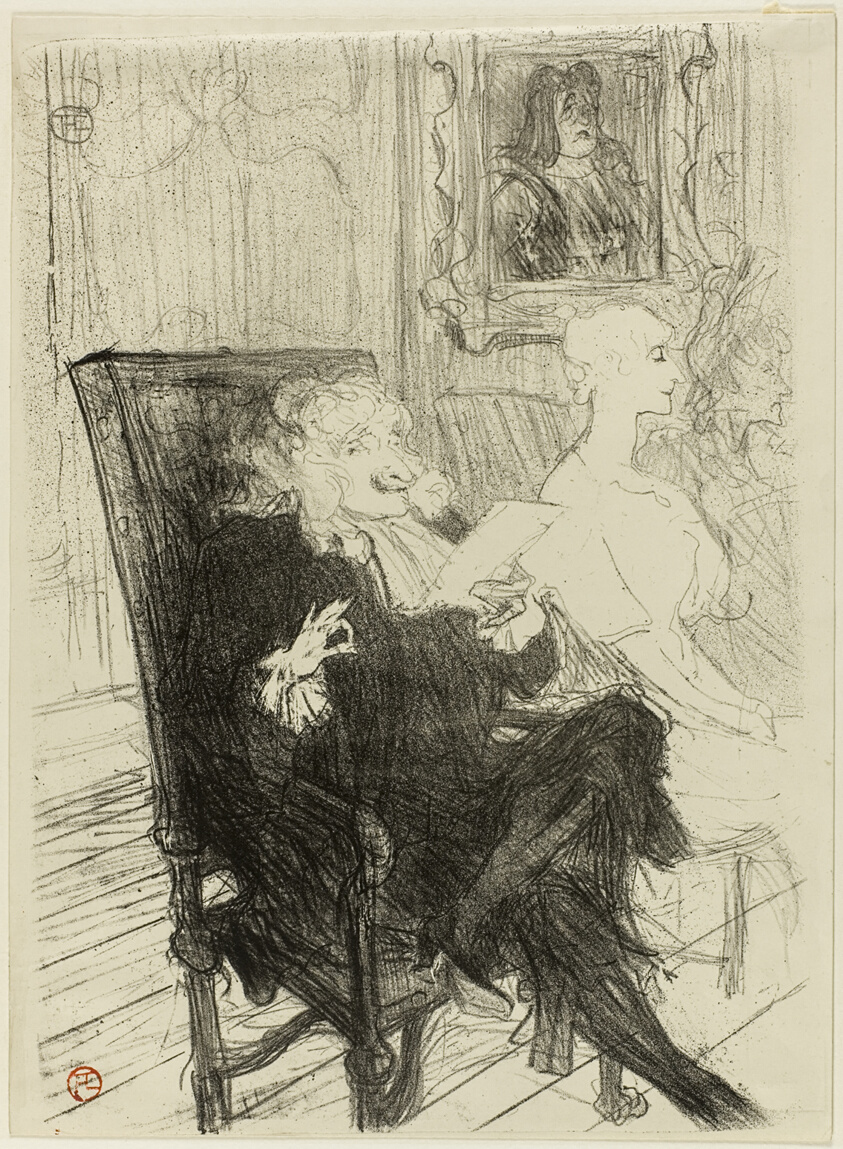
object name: Print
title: Truffier and Moreno, in Les Femmes Savantes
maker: Henri de Toulouse-Lautrec (French, 1864-1901)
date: 1893, published 1894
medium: Lithograph on cream wove paper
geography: France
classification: lithograph; print; prints and drawing